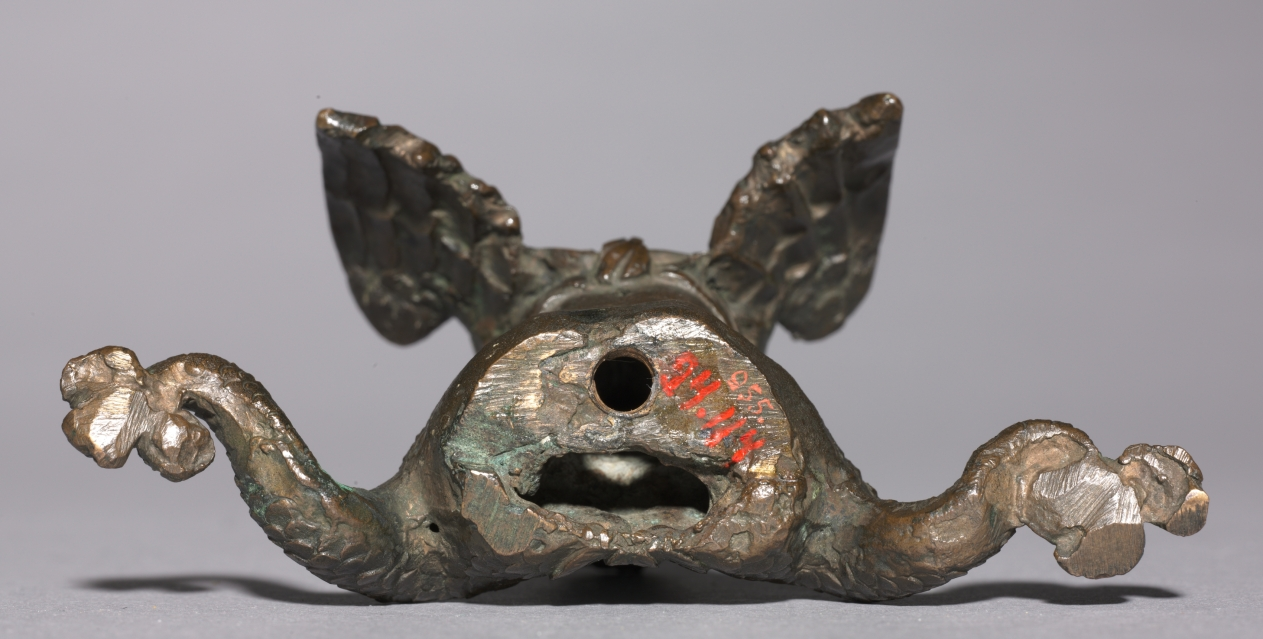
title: Doorpull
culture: Italy, 16th century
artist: Leone Leoni (Italian, 1509–1590)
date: 16th century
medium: bronze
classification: Sculpture